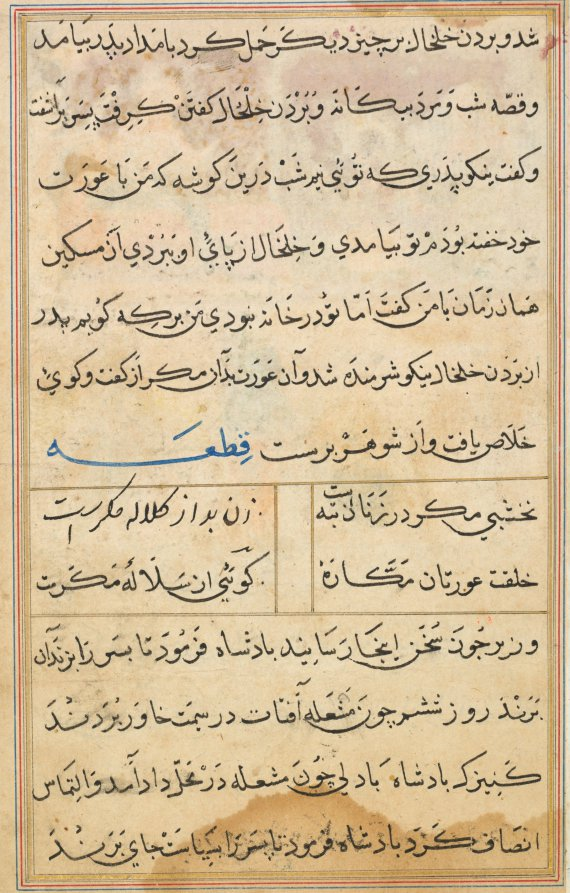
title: Page from Tales of a Parrot (Tuti-nama): text page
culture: Mughal India, court of Akbar (reigned 1556–1605)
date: c. 1560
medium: gum tempera, ink, and gold on paper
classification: Painting